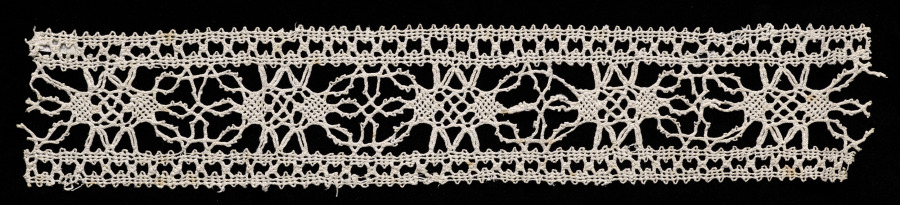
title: Lace Insertion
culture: Italy, Venice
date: 1540–60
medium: Bobbin lace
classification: Lace